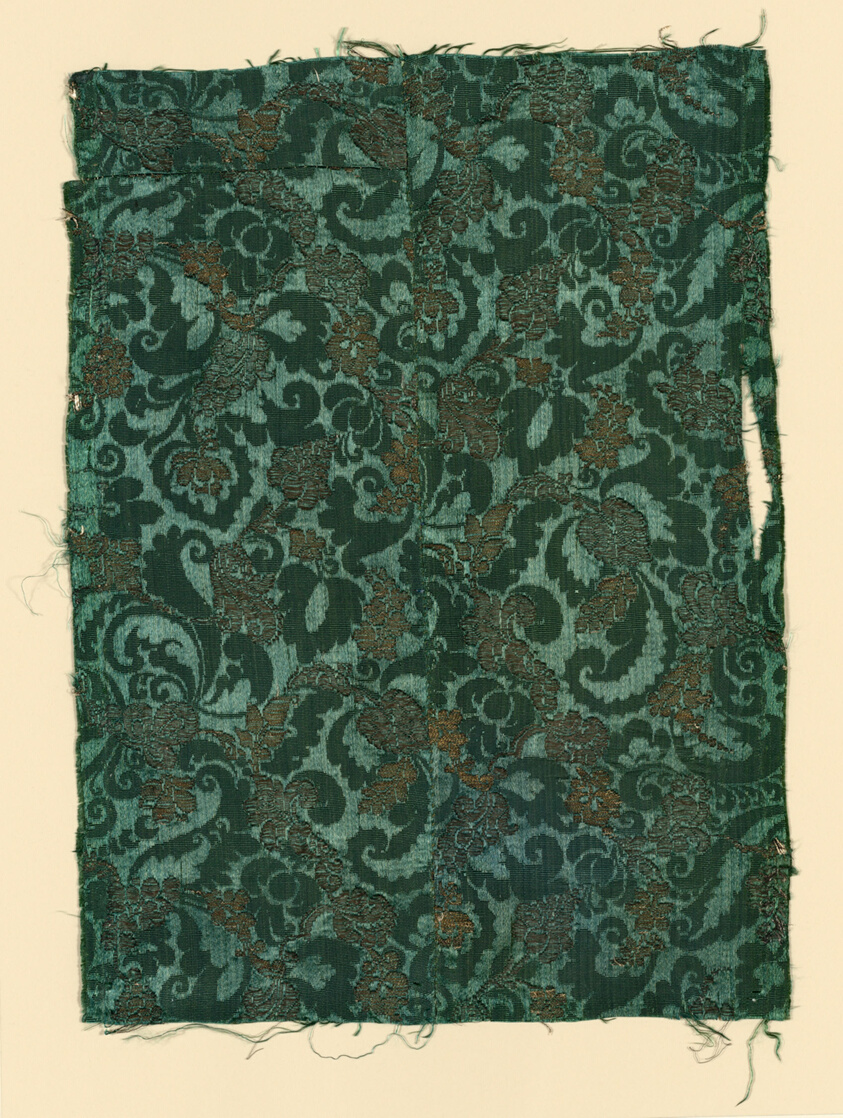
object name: Textile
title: Fragment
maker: Italy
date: 17th century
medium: Silk and gilt- and silvered-metal-strip-wrapped silk, warp-float faced satin weave self-patterned by areas of plain weave with supplementary brocading wefts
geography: Italy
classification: textile; weaving